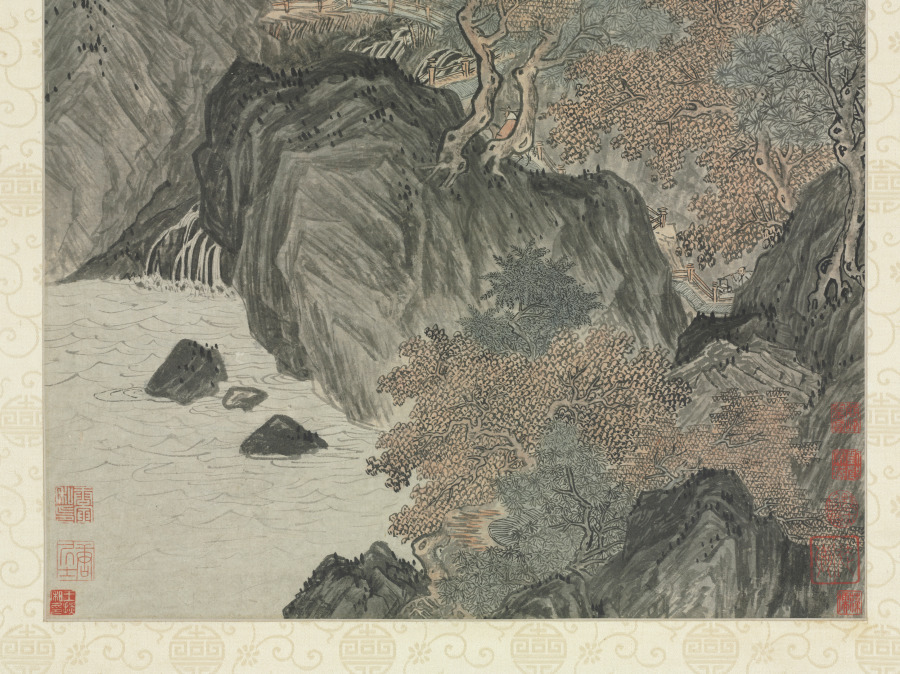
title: Mount Hua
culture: China, Ming dynasty (1368–1644)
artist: Tang Yin (Chinese, 1470–1523)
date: 1506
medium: hanging scroll; ink and light color on paper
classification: Painting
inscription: Artist's inscription, signature, and 4 seals: Wearing a white-bordered scholar's robe and green jade pendants, His life is unconcerned with worldly fame. Like P'an Lang resisting old age through high spirits, Crazy and clumsy he rides his donkey past Mount Hua. T'ang Yin painted this and composed the poem, the first month of the year of the Cheng-te era [1506]. [2 seals] T'ang Tzu-wei yin; T'ang. [2 seals, lower left corner] Po-hu T'ang Yin ssu yin; T'ang Chü-shih. trans. LYSL 12 additional seals: 2 of Wang Shan (1645-1728); 5 of Liu Shu (1759-1816); 1 of Yeh Ao (19th c.); 1 label and 2 seals of Lu Hui (1851-1920); 2 seals unidentified.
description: In this work, Tang Yin accumulates towering mountain summits in the manner of the Sung master, Li Tang, to capture the monumental presence of his subject. Tang Yin’s angular brushstrokes and ink washes of varied intensity give texture to the rocky surface and accent the play of light. Mount Hua is situated in southern Shaanxi province in North China. Hardly accessible during Tang Yin’s time, the mountains were frequented by immortality seekers to dwell or collect herbal drugs there. Tang Yin's potentially brilliant career was shattered in 1499 after he went to the capital to take the jinshi examination. He got entangled in a bribery case that caused him to spend seven years in prison. After his release, Tang returned to Suzhou, and settled on a career as a professional painter. One of Tang's few dated works, Mount Hua was painted seven years after this incident.